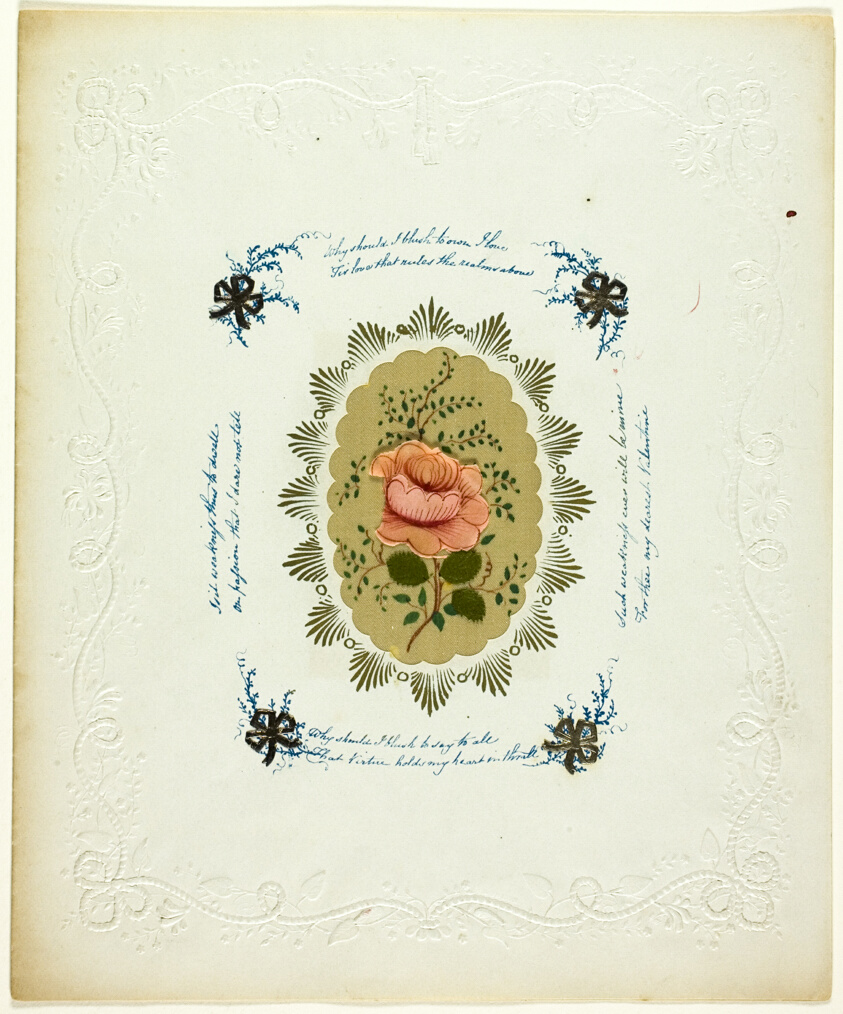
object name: Drawing and Watercolor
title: Why Should I Blush (valentine)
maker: George Kershaw (English, 19th century)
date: c. 1840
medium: Lithograph and collaged elements, with watercolor and pen and blue ink on cut and embossed ivory wove paper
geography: England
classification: valentine; prints and drawing; paper